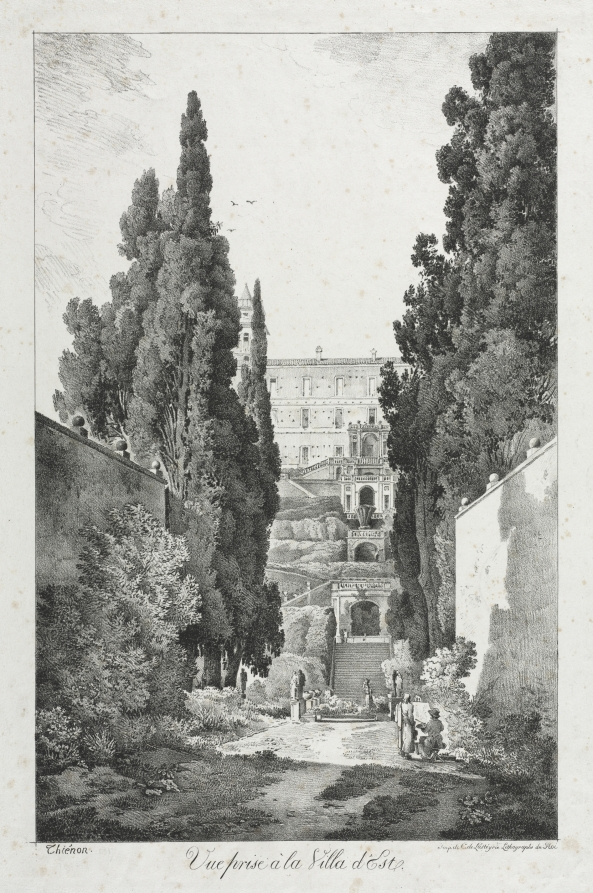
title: View at Villa d'Este, Tivoli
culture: France, 19th century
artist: Claude Thiénon (French, 1772–1846)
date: 1817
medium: lithograph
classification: Print